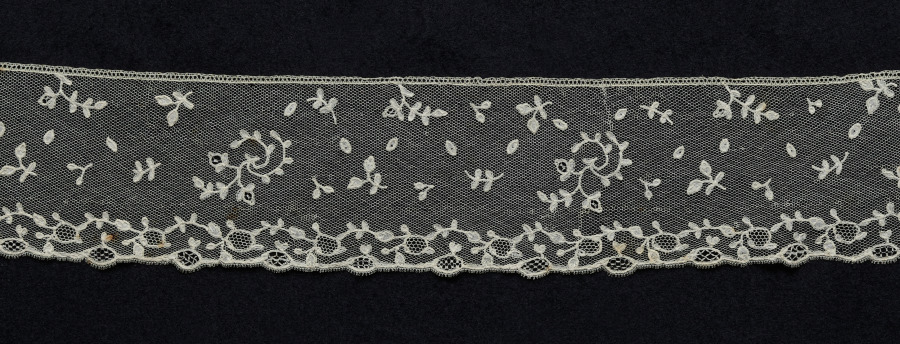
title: Lace Edging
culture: Belgium, Brussels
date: late 1800s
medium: Bobbin lace with appliquéd net ground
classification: Lace